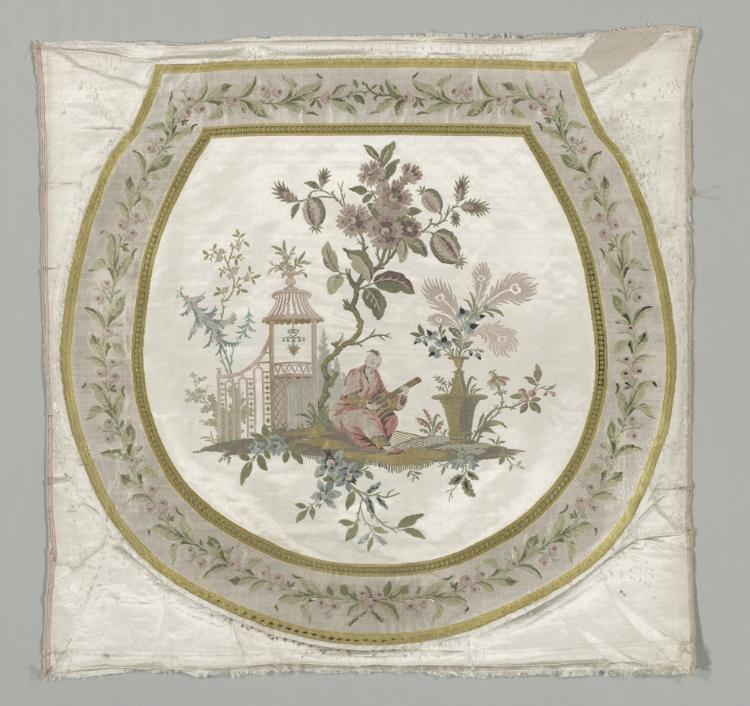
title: Upholstery for a Chair Seat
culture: France, 18th century, style of Louis XV (1723-1774)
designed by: Philippe de Lasalle (French, 1723–1805)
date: c. 1743–1774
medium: lampas weave, brocaded; silk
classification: Textile